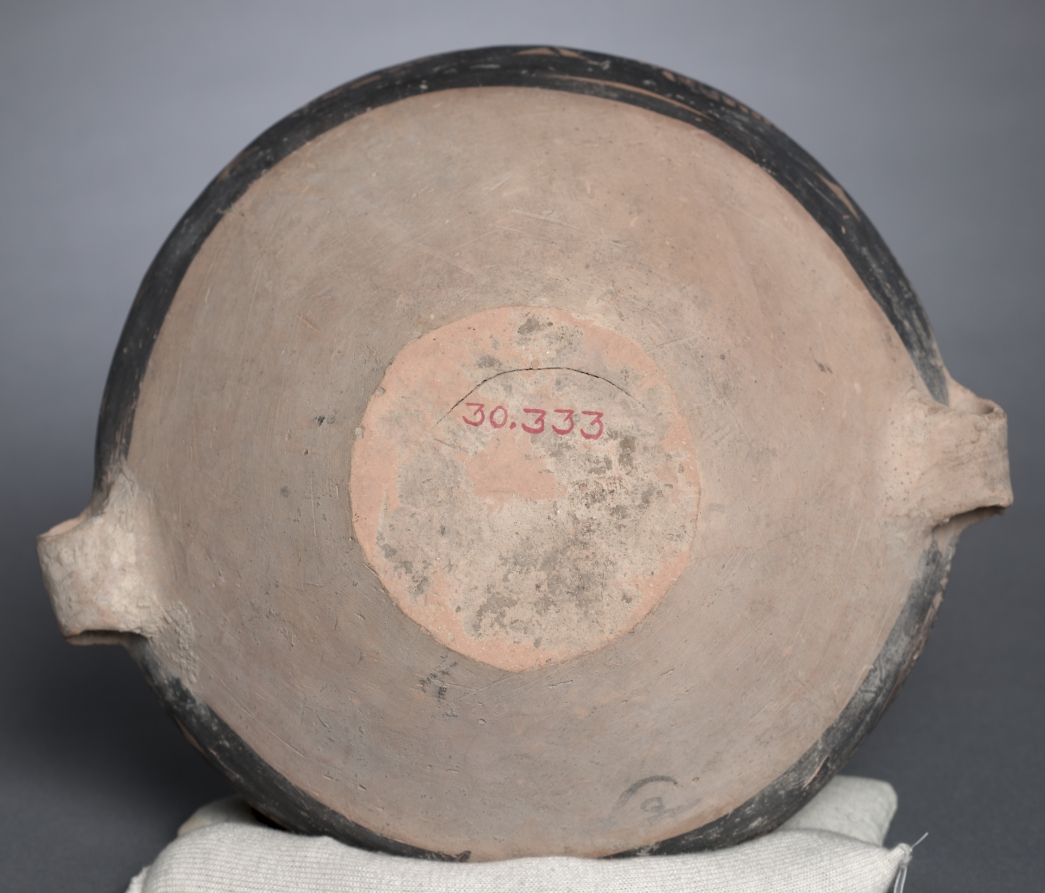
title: Vase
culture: China, Gansu province, Neolithic period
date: c. 3000–2500 BCE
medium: earthenware with slip coating and painted decoration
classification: Ceramic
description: This Neolithic Chinese vessel has an ovoid body with two handles. Its neck is short and splays outward into a wide opening. It is decorated with a continuous lozenge motif. The material is a fine, reddish-buff clay slightly polished and then painted in black and red.